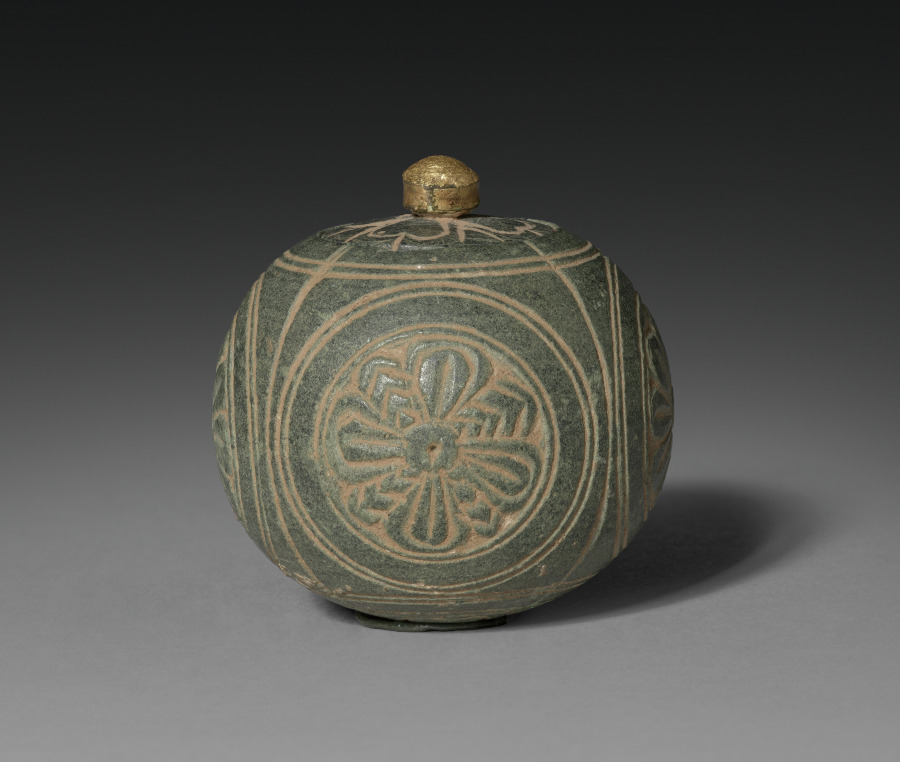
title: Miniature Stone Reliquary or Toilette Casket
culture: Pakistan, Gandhara, probably Sirkap, early Kushan period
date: 1–100 CE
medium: gray schist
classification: Sculpture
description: Tiny reliquaries holding the cremated remains of the Buddha or a high-ranking holy person empowered monuments and made them sacred. A Buddhist monument, such as the solid hemispherical mounds called stupas, would not be worshipped until it was consecrated with the relic secreted inside. Bits of ash were combined with tiny gems inside a crystal or glass reliquary, which was then placed inside a stone or metal container, like the lidded versions seen here. These containers look like cosmetic vessels for aromatic pastes used for perfume in ancient India. Buddhist texts state that the enlightened Buddha emitted a fragrance like sandalwood paste; the form of the reliquary as a perfume bottle indicates the presence of the Buddha by the visual reference to his pleasant scent. Once enclosed in the stupa the reliquaries would not be seen, but monks were tasked with applying sandalwood paste to the exterior of stupas as part of their regular maintenance to convey to visitors the ongoing presence of the Buddha radiating from the relic in the center.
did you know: The knob of the lid is gilded, as is the interior of the casket.